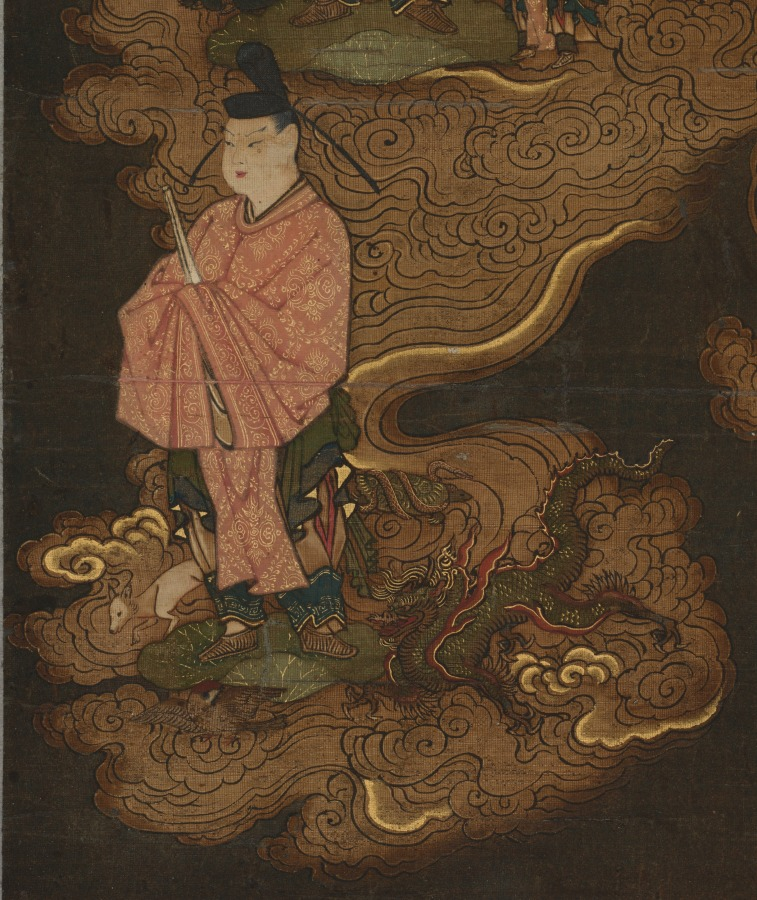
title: Descent of the Nine Luminaries and the Seven Stars at Kasuga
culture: Japan, Nanbokuchō period (1336–92)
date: mid- to late 1300s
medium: Hanging scroll; ink, color, gold and cut gold on silk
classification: Painting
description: This medieval religious painting shows celestial beings descending from the heavens into the Kasuga Shrine, a major religious site in Japan's ancient capital, Nara. The moon and the Kasuga mountain range appear in the uppermost portion of the painting, as does a red shrine entrance gate, or torii. In the upper part of the painting, figural representations of the stars in the constellation known as the Big Dipper in the West descend from right to left on cloud banks. In the lower part, the Nine Luminaries (Sanskrit: Navagraha) that emerged from the Vedic tradition—the sun and moon; the planets Jupiter, Mars, Saturn, Venus, and Mercury; and personifications of the fluctuating lunar nodes—descend in similar fashion. The painting uses the "deities in descent" scheme originating in China, as well as the original Buddhist form mandala (Japanese: honjibutsu mandarazu) format prevalent in medieval Japanese Shinto-Buddhist painting, to generate an image connected to the worship of celestial bodies in Esoteric Buddhism.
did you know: A 19th-century copy of this painting in ink and light color exists at the Kyoto City University of Arts.